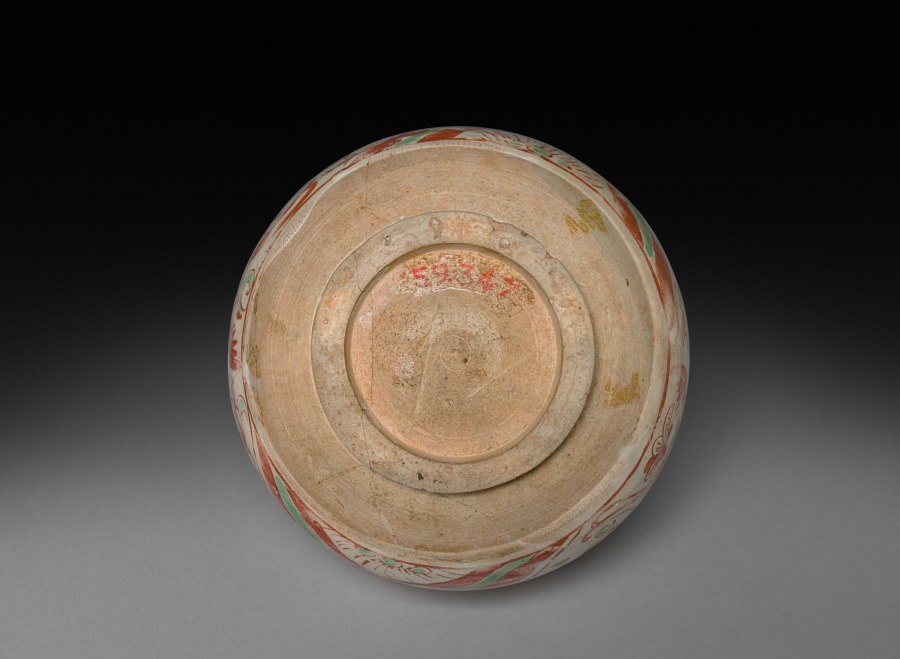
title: Bowl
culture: China, Jin dynasty (1115-1234) - Yuan dynasty (1271-1368)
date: 1200s–1300s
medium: buff stoneware with underglaze slip application and overglaze enamel decoration; Cizhou ware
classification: Ceramic